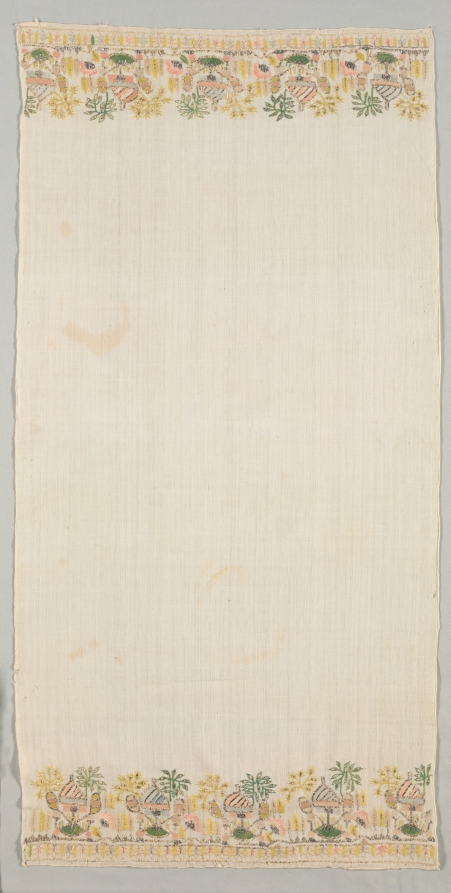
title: Embroidered Towel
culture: Turkey, mid 18th century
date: mid 18th century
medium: embroidery; silk and gold filé on cotton tabby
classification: Embroidery